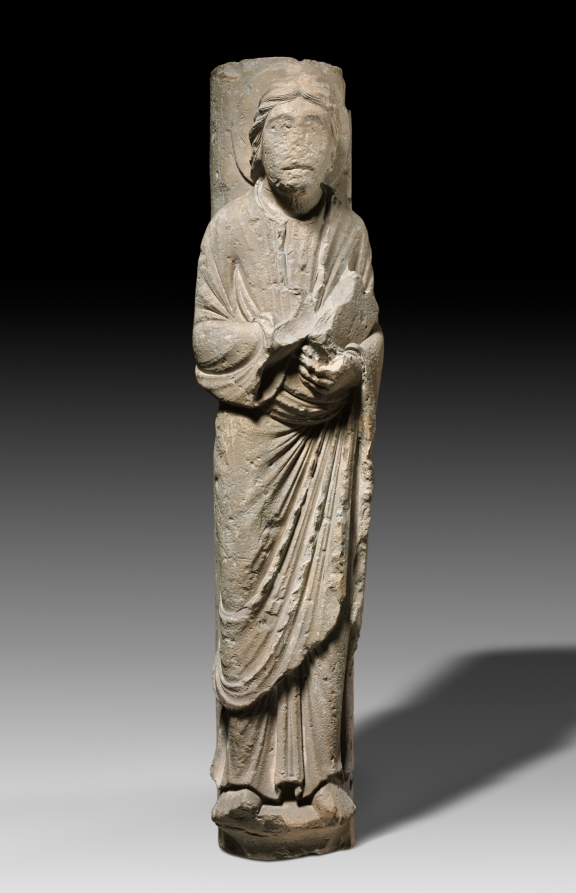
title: Columnar Figure of an Apostle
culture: France, Champagne, Châlons-sur-Marne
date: c. 1180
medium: limestone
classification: Sculpture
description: This figure of an apostle, probably Saint John the Evangelist, attached to its supporting column, came originally from the cloister of the Church of Notre-Dame-en-Vaux at Châlons-sur-Marne. A cloister was a covered walkway usually around all four sides of a square area of grass (the "cloister garth"). The seclusion of the cloister was the exclusive domain of the monks or clergy and off-limits to others. Here, the monks were able to pray, study, meditate, and exercise in privacy and solitude. This figure illustrates the transition in style from Romanesque to Gothic taking place in ecclesiastical buildings across northern France during the late 1100s.